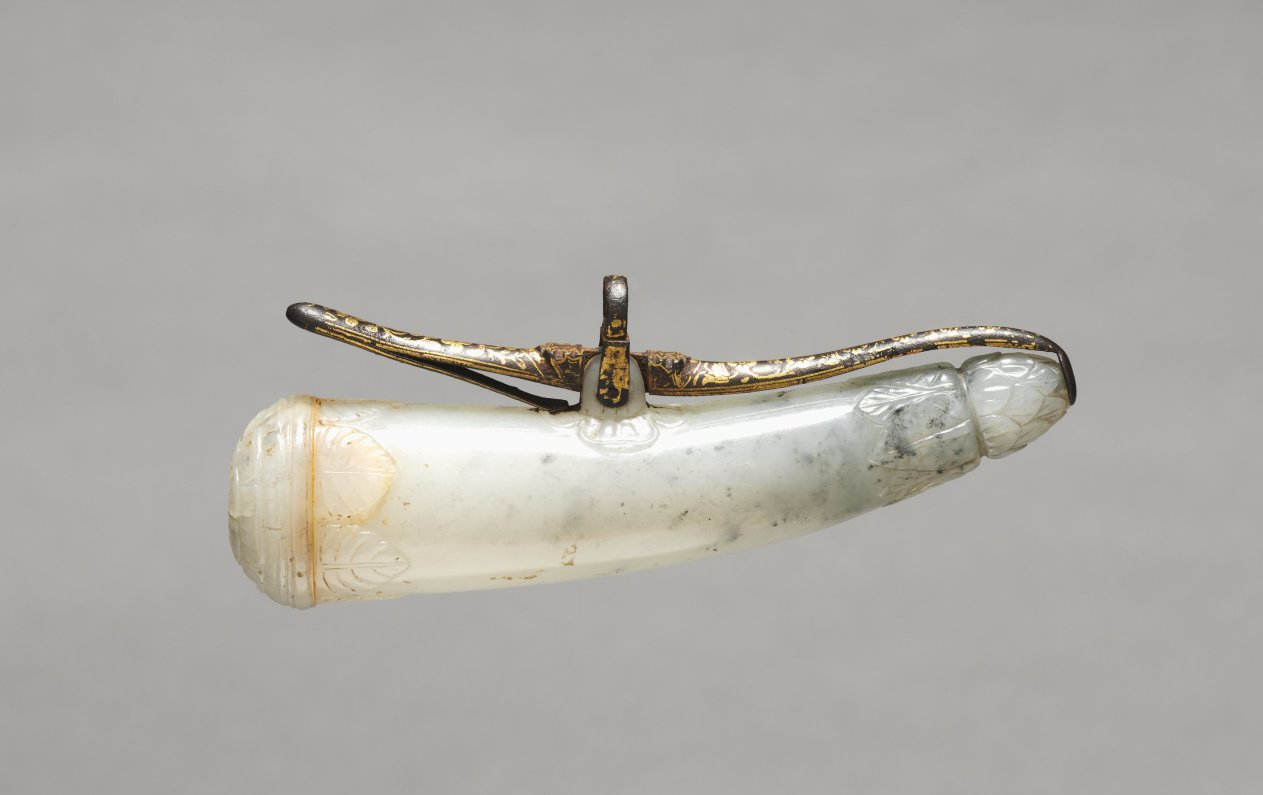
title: Powder horn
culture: India, Mughal, 17th-18th century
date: 1600s-1700s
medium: Jadeite, iron inlaid with brass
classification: Jade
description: Like the firearms themselves, powder horns were made as courtly accessories to be worn as objects of beauty. Most Mughal nobles also served as military commanders, and accouterments of war would be worn as part of their formal attire. For this reason, artisans used precious materials such as white jade, which in this example has been carved with leaf and petal patterns, its natural black inclusions treated as ornament. Pressing down on the simple mechanism opens the hollow inner chamber from which small amounts of gunpowder were administered into the pan of a matchlock musket.